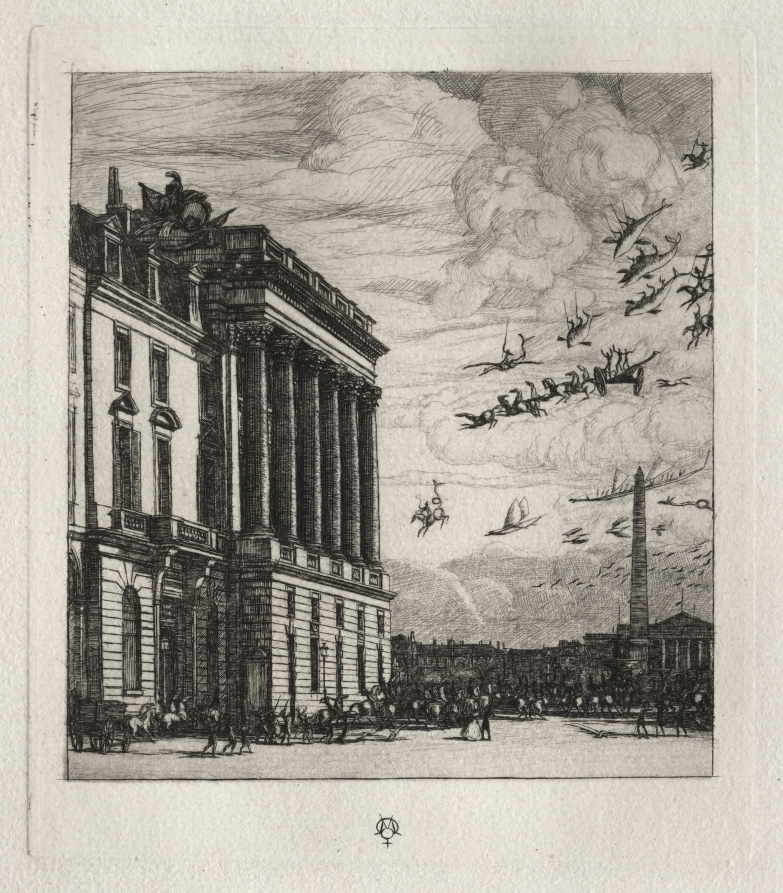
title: The Admiralty, Paris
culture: France, 19th century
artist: Charles Meryon (French, 1821–1868)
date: 1865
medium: etching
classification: Print